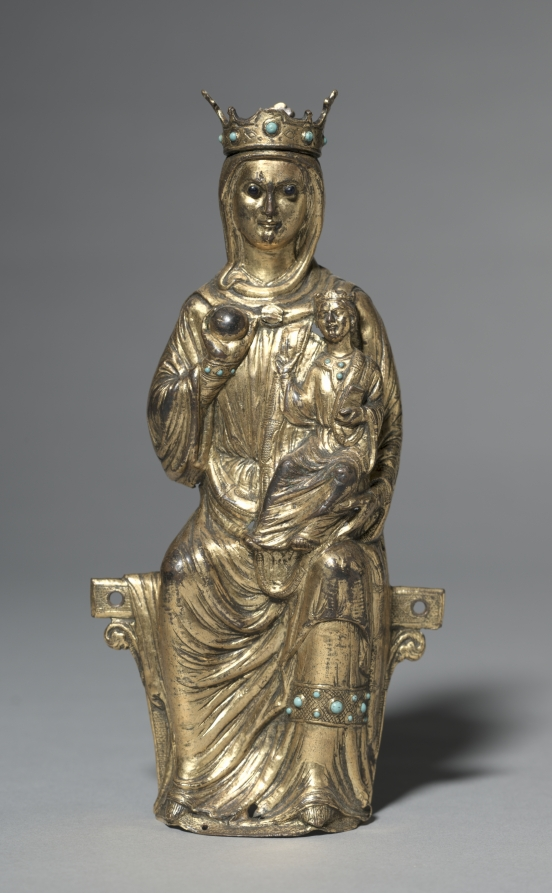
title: Enthroned Virgin and Child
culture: France, Limousin, Limoges, Gothic period, 13th century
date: 1225–50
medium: copper: repoussé, gilded, engraved, chased; black glass beads; light turquoise enameled pearls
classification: Sculpture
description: Both the Virgin and the Christ child are lavishly attired. Their mantle hems are engraved to create the illusion of being fur-lined, and turquoise enamel beads create "pearl"-studded decorative bands on the Virgin’s wrist, knee, and crown and on Christ’s collar. The similarity of their garments emphasizes the close relationship between the mother and child and their joint rule over the kingdom of heaven. Once part of a larger ensemble, this relief may have decorated an altar frontal, devotional tabernacle, or reliquary.